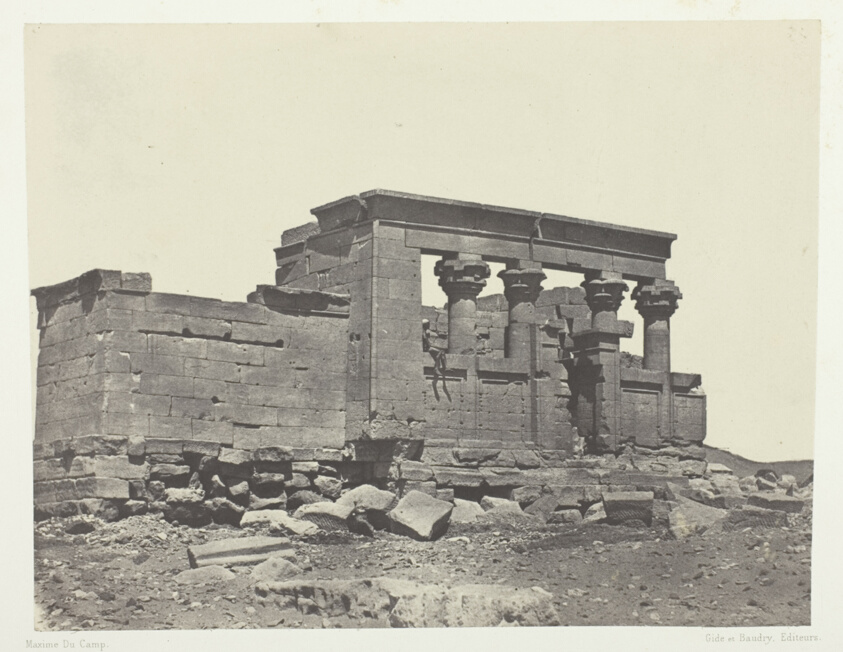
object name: Photograph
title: Temple de Débôd, Parembole de l'Itinéraire d'Antonin; Nubie, plate 86 from the album "Egypte, Nubie, Palestine et Syrie" (1852)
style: 19th century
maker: Maxime Du Camp (French, 1822–1894)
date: 1849/51, printed 1852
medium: Salted paper print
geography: France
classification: salted paper print; photographic process; photography; photograph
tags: Collected by Hugh Edwards, Egypte, Nubie, Palestine et Syrie